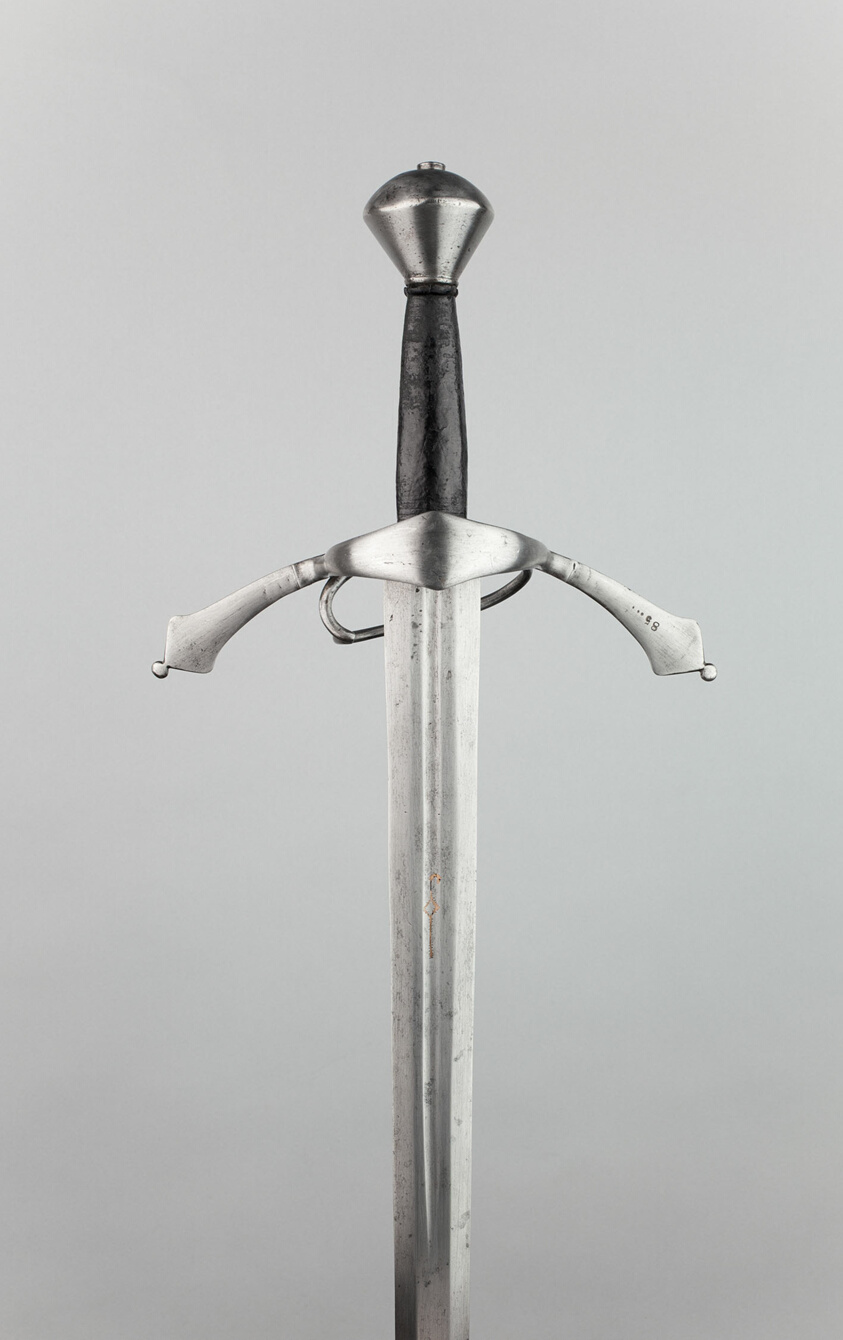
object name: Arms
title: Sword from the Armory of Schloss Ambras, Innsbruck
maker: Hilt: German or possibly Austrian (Innsbruck); Blade: German, Passau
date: 1570/90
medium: Steel, brass, wood, and leather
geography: Germany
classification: edged weapon-sword; arms; arms and armor